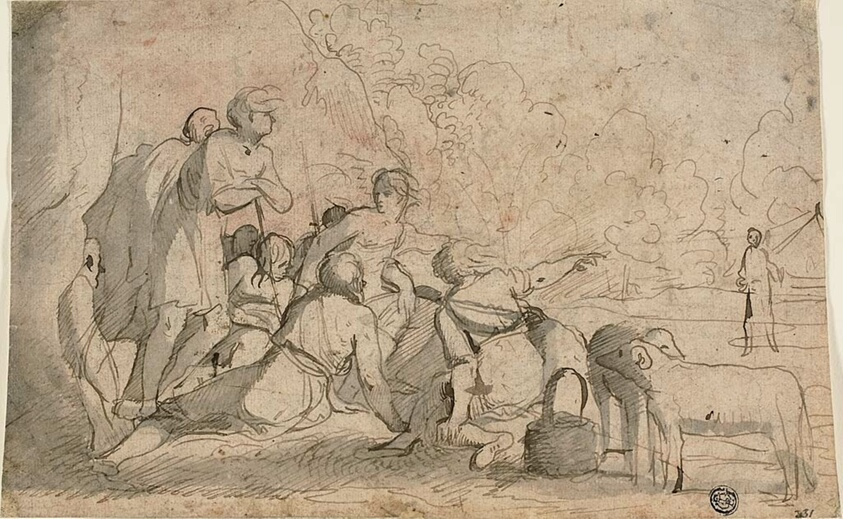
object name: Drawing and Watercolor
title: Group of Shepherds and a Ram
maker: Follower of Pietro Testa; Italian, 1611/12-1650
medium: Pen and brown ink with brush and gray wash, on buff laid paper, laid down on Japanese paper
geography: Italy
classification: pen and ink drawings; drawings (visual works); prints and drawing